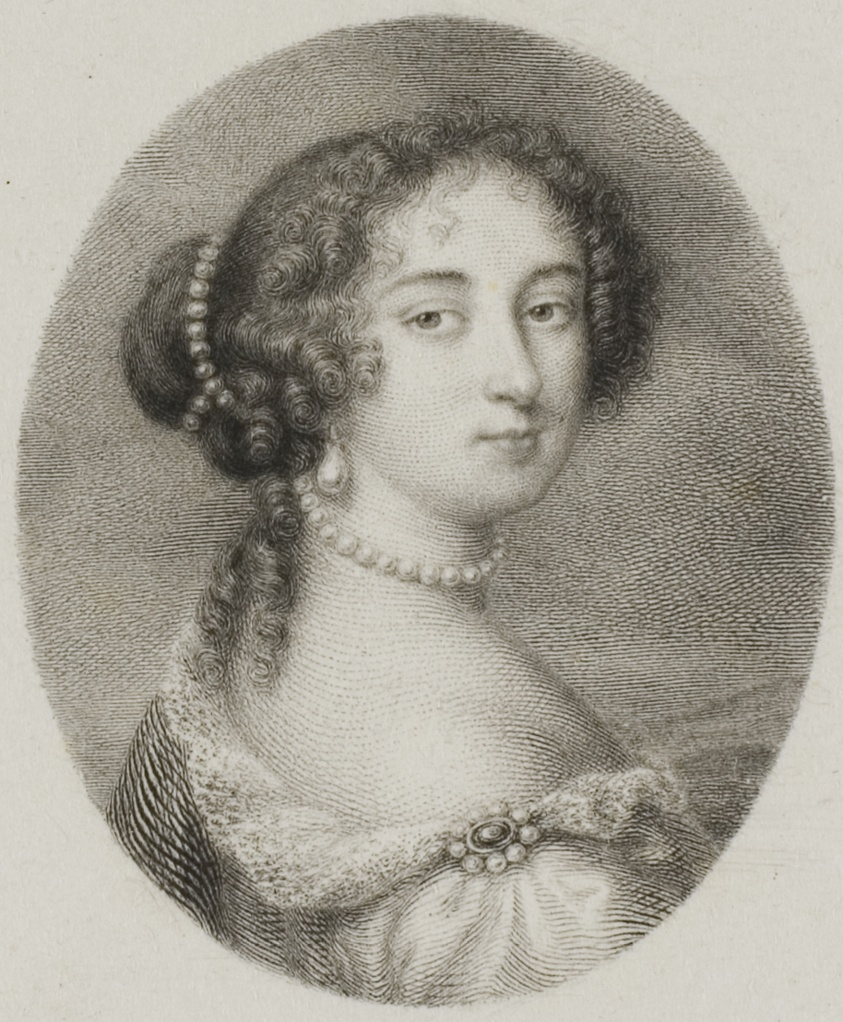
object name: Print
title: Mme. de Maintenon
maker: Paolo Mercuri (Italian, 1804-1884)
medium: Engraving in black on paper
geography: Italy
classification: etching; print; prints and drawing